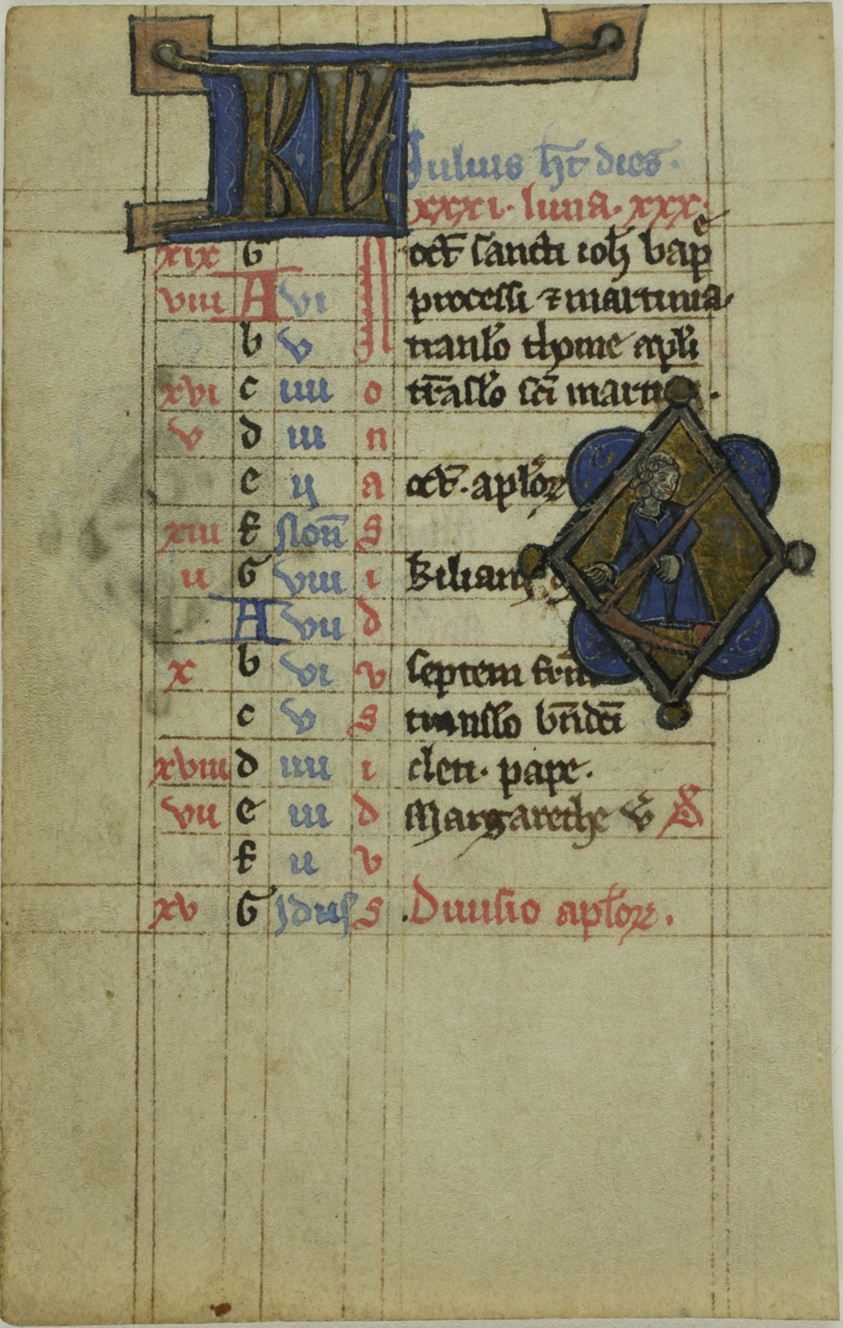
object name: Drawing and Watercolor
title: Figure with Scythe, Illuminated Initials "KL" or "BV" recto, and Fish with Lobster Claws, verso, from a Psalter or Book of Hours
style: medieval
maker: Flemish (probably Liège, possibly Benedictine)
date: 1275/1325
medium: Manuscript cutting with decorations in tempera and gold leaf, and with inscriptions in dark brown, red and blue ink, ruled in dark brown ink, on vellum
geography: Flanders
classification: manuscript; pen and ink drawings; gouache; tempera; gold; prints and drawing